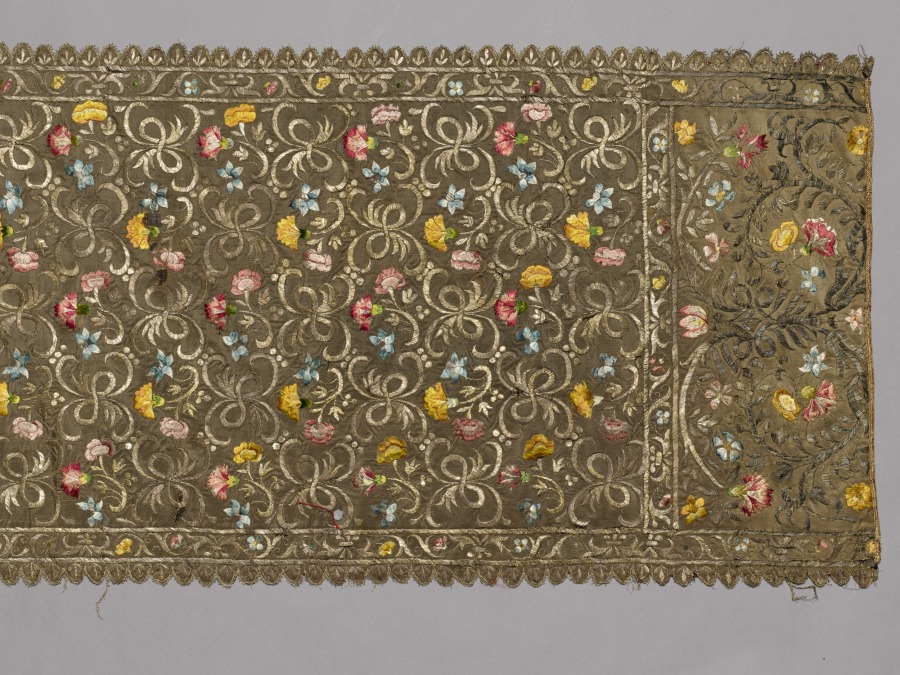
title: Panel, Probably from a Christening Mantle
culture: Italy, late 16th century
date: late 1500s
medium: Silk, gold thread; embroidery: couching, stem, long, and short stitches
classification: Embroidery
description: This panel is likely from a christening mantle, a decorative shawl or cape worn during the procession at a christening. This example features radiant gold thread enhanced with eight vibrant colors of shiny silk thread that create a delicate pattern of blossoms issuing from ornate stems. The decoration forms the main field and two end sections bordered by foliate motifs.